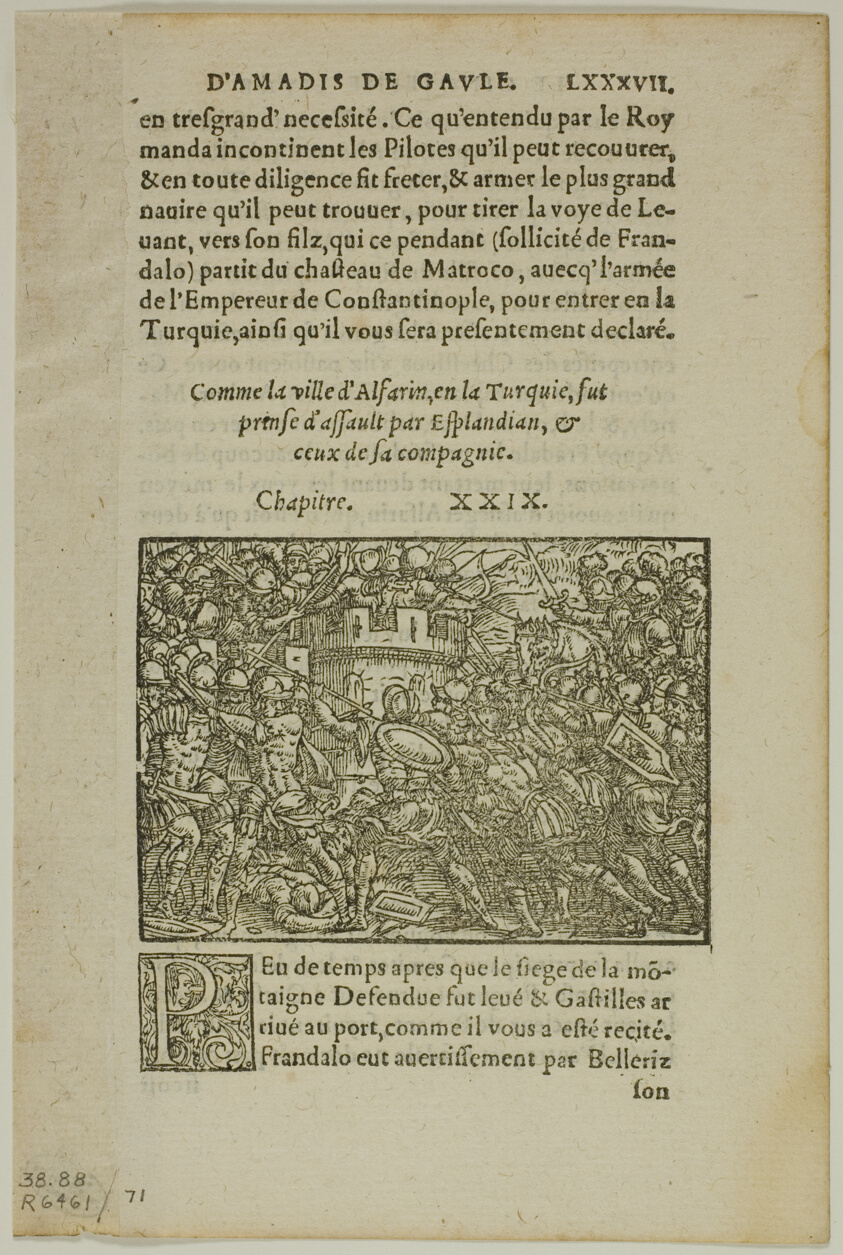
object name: Print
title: Leaf from Amadis de Gaule, plate 71 from Woodcuts from Books of the XVI Century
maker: Unknown Artist (French, 16th century); assembled by Max Geisberg (Swiss, 1875-1943)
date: 1560, assembled into portfolio 1937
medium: Woodcut on paper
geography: France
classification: woodcut; print; prints and drawing